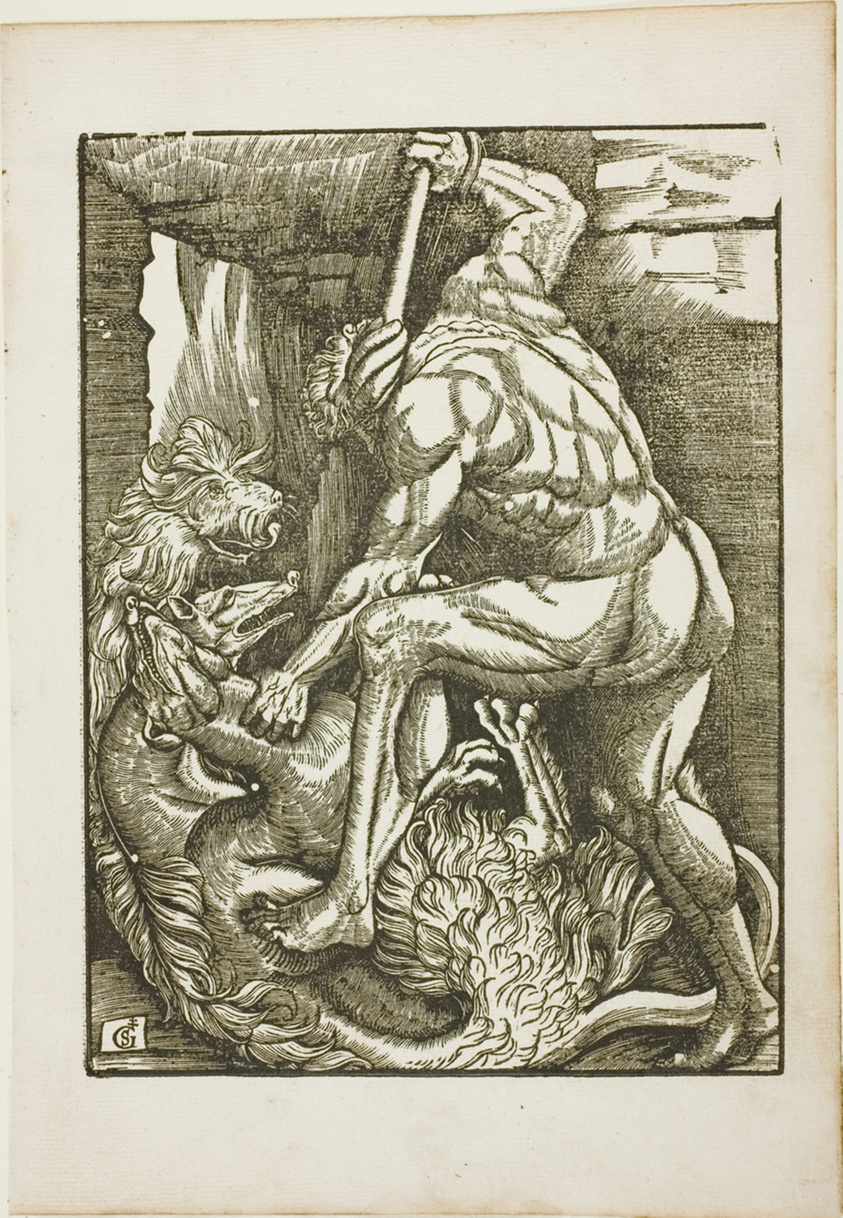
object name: Print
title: The Labors of Hercules: Bringing Cerberus from the Lower World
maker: Gabriel Salmon (French, active 1504-1542)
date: c. 1528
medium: Woodcut on paper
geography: France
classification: woodcut; print; prints and drawing